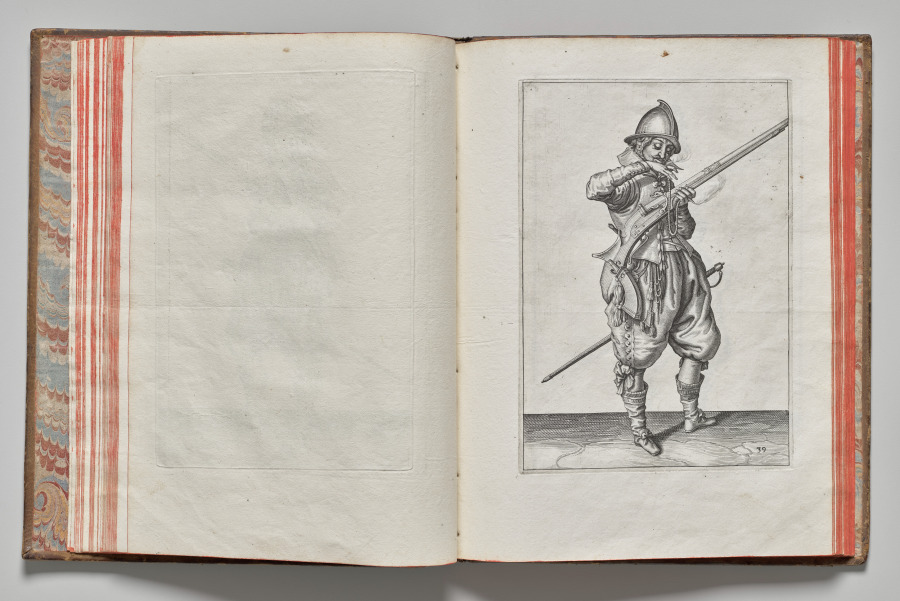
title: The Exercise of Armes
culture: Netherlands, The Hague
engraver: Jacob de Gheyn II (Netherlandish, 1565–1629)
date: 1607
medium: leather bound paper, 117 engraved plates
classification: Bound Volume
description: The Exercise of Armes, published in 1607–8, is one of the most famous manuals of arms. Jacob De Gheyn's book became popular all over Europe and was quickly translated into several languages. Its 117 copper engravings portray the step-by-step sequence for training foot soldiers in the handling of standard weaponry of 17th-century warfare: muskets, matchlock or calivers, and pikes.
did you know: The depiction of the soldiers in this book inspired Rembrandt when painting his famous The Night Watch.